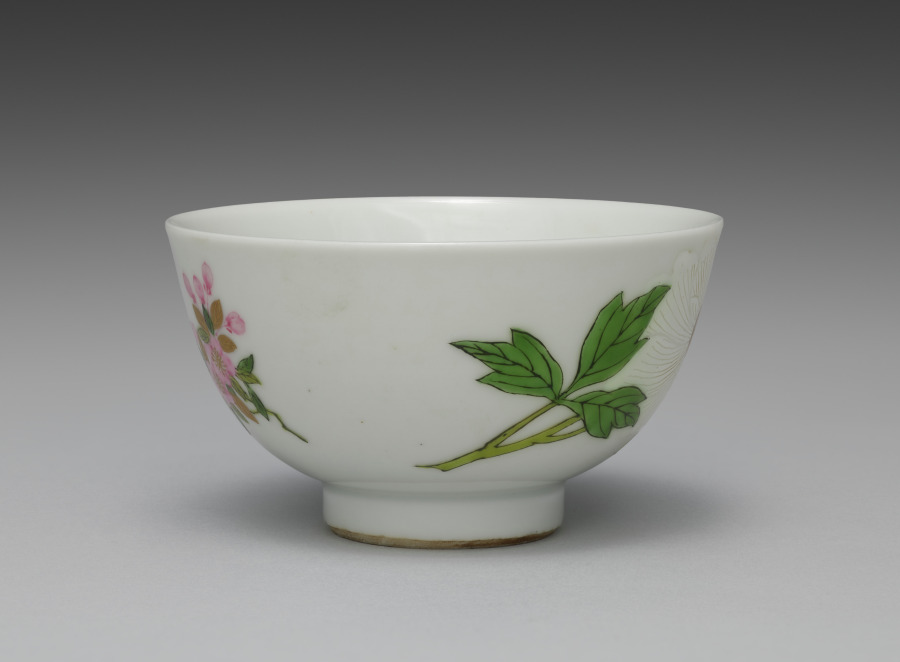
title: Teabowl from Teabowls with Peony and Crabapple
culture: Japan, Meiji period (1868–1912)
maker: Seifū Yohei III (Japanese, 1851–1914)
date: 1893–1914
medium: One from a set of five teabowls; porcelain with underglaze and overglaze color enamels and gold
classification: Ceramic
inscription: 清風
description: Overglaze color enamels are generally called iro-e (literally “color picture”) in the terminology customarily used for porcelain decoration of the Edo period. This set of teabowls is a fine example of Yohei III’s skilled use of the technique, which is identified on this set’s box lid with the alternate phrasing “porcelain with color painting” (jisaiga). Distinct from the way overglaze colors were used in Kakiemon ware from Arita, his designs and applications show a consciousness of porcelain decoration of the Qing dynasty. Here, he combines Chinese models with a sensibility taken from Kyoto ware precedents, including painting with powdered gold (kinrande). The colors used in the bowls are as follows: blue, black, gold, white, light green, green, and pink. The blue appears only inside the footring, as a double band of underglaze color. The black iron, used for stems and leaf veins, is painted over the glaze. The gold, also painted over the glaze, is used for leaves and the centers of flowers, for solid, glossy lines defining detail, or as a semimatte ground. Yohei has incised lines of varying widths into the pigment, carving away to the bowl’s surface, to differentiate individual petals and their rippled shapes. The light and dark greens, as well as the pink, are painted over the glaze. Of note is how Yohei has first used thinly applied lines of light green to draw the plum branch before applying the opaque iron black. For the plum buds and flowers, he has used a diluted pink with an opaque pink for outline, both over the glaze. In his later works, Yohei used pink both over and under the glaze in a manner similar to underglaze blue, and it can be challenging in some cases to discern which technique he has used. A lidded container in a private collection has a similar design but is augmented with the inclusion of white and purple magnolia blossoms. In contemplating the original decorative program of a set, of which these teabowls may have been a part, it is worth considering that perhaps not all objects included the full range of motifs. In such cases, the composition of the individual object may be best understood within the context of the extended ensemble. Here, the delicate pink plum on one side of the bowl seems slightly unbalanced with the bold white peony on the other, but when seen with other objects with the magnolia and its additional colors and shapes, it is possible to imagine a set with a complex, balanced design across multiple pieces.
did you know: The white of the peony flower is built up to a low relief over the glaze.